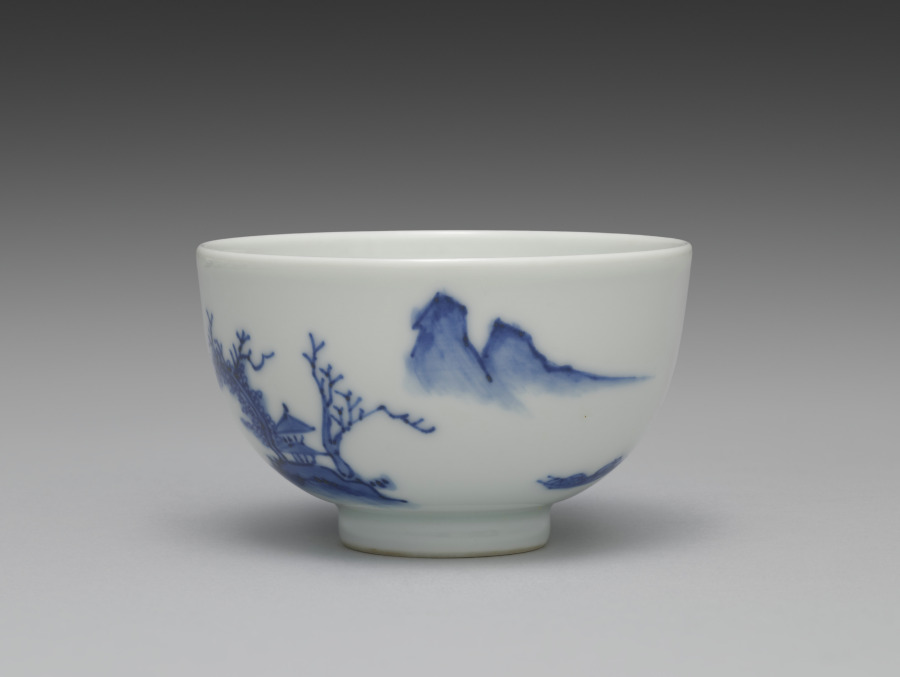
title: Teacup from Tea Set with Chinese Landscape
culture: Japan, Meiji period (1868–1912)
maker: Seifū Yohei III (Japanese, 1851–1914)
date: 1893–1914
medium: Porcelain with underglaze blue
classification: Ceramic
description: This tea set has a side-handled pot called a kyūsu, used for steeping, straining, and serving tea. Unlike some others, this set also has a yuzamashi, a container used to cool boiled water to just the right temperature for the best flavor when steeping. Seifū Yohei III’s painting teacher, Tanomura Chokunyū (1814–1907), made a visual record of famous sencha events that shows how these kinds of porcelains fit with objects such as a stove and kettle to form a complete set of utensils for tea preparation, and with ensembles of decorative objects meant to inspire creativity. The theme of this sencha tea set is the Chinese scholar-recluse in an idyllic landscape. Each of the five teacups has a landscape with an architectural structure and some human activity.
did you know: This cup shows a man in a traveling robe leaning upon his staff as he crosses a bridge to reach a two-story building with a pitched roof, possibly a temple, set between trees. Past this structure, another man sits fishing in a boat.